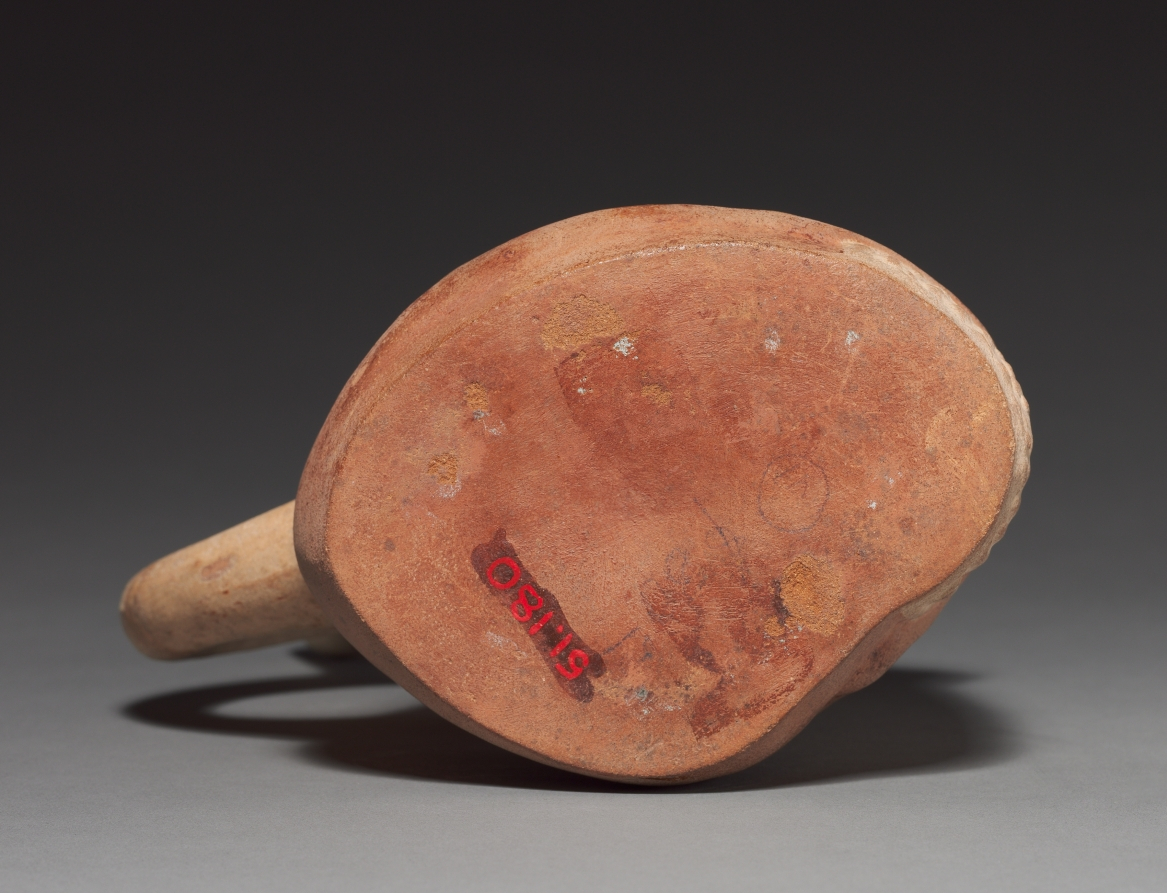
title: Rodent with Corn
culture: Peru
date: 50–800 CE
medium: pottery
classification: Ceramic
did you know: From the Moche, renowned for animal portraits, comes this rodent gnawing maize (corn).